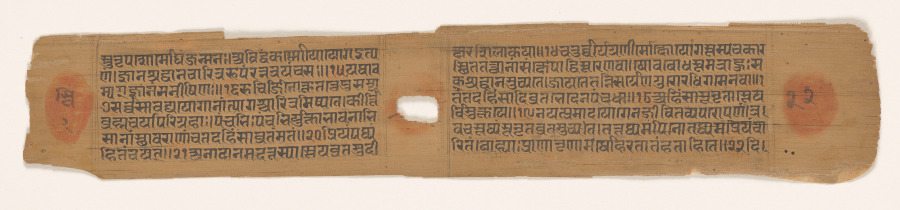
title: Text, folio 22 (verso) from a Yoga-shastra of Hemachandra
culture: Western India, Gujarat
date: c. 1275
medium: Gum tempera and ink on palm leaf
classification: Painting